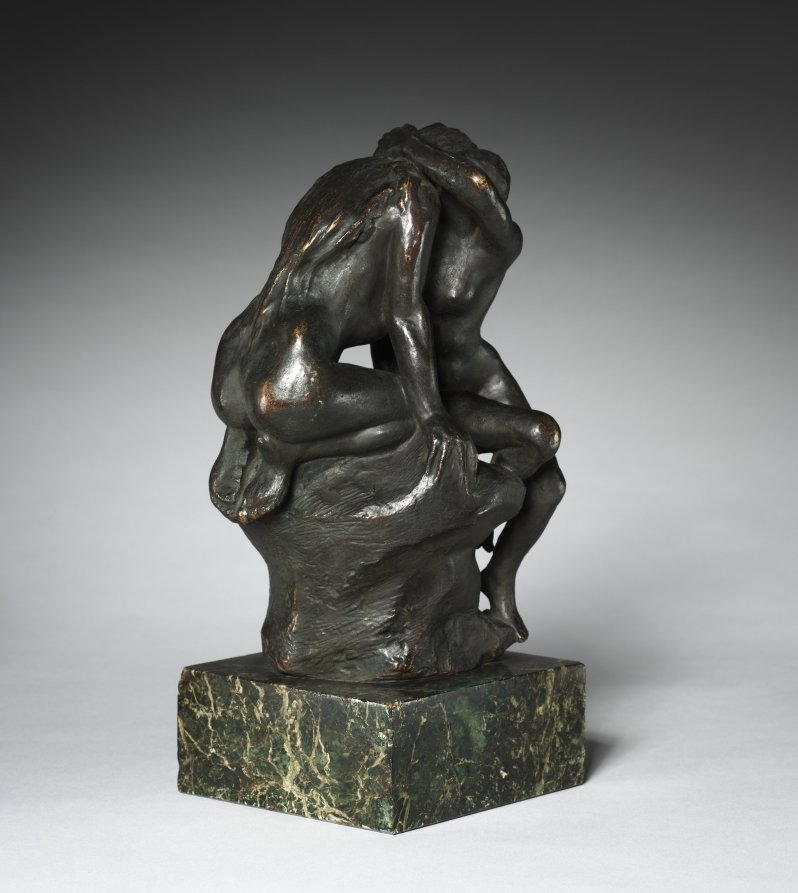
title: Young Girl Confiding Her Secret to Isis (Jeune fille confiant son secret à Isis)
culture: France, 19th century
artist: Auguste Rodin (French, 1840–1917)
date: 1899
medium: bronze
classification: Sculpture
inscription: Inscribed in area below larger figure's left hand and smaller figure's right hand: "Rodin"; below feet of larger figure: "L. Persinka, Fondeur, Versailles"